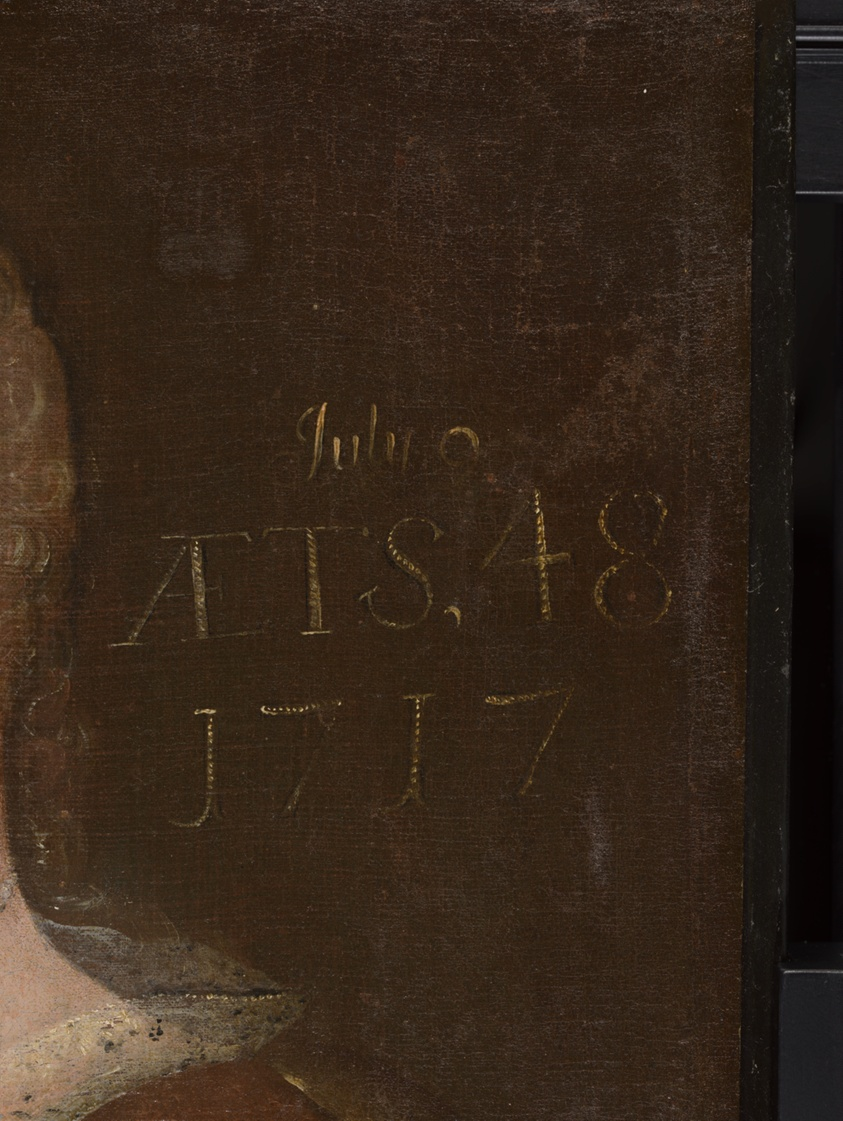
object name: Painting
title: Mrs. Vanderveer, or Mrs. Vandeveer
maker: Artist unknown (American, 18th century); Formerly attributed to John Watson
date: 1717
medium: Oil on canvas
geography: United States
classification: painting; american arts